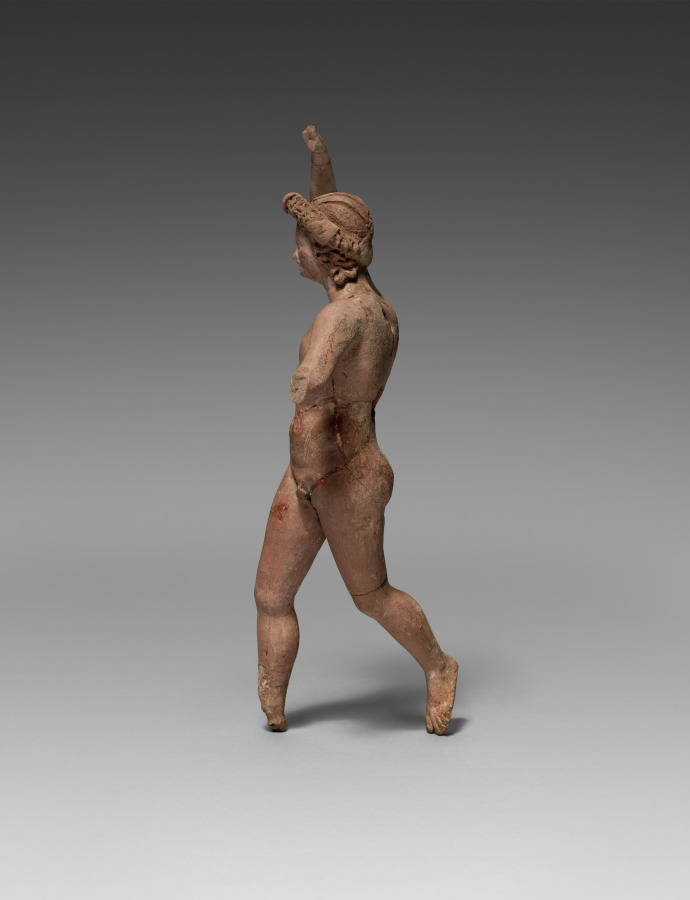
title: Dancing Eros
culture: Anatolia, Myrina, Greece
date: 300–200 BCE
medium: terracotta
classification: Sculpture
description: The region of Myrina in Asia Minor (now part of modern Turkey) is known for its abundance of ancient terracotta figurines. Eros, the Greek god of love, was especially popular. Here he is depicted as a nude youth, not a small child. Eros’ extra-long legs and arms, though only partially preserved, are thrown about in a carefree dance. He wears a celebratory floral crown atop his long curls. Once probably fully painted, only traces of red pigment survive on the face. A figurine like this one may have been a votive or offering of thanks to Eros or Aphrodite, his mother, also a goddess of love, for a successful marriage.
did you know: Figurines of Eros are often paired with figurines of his mythological wife, Psyche.